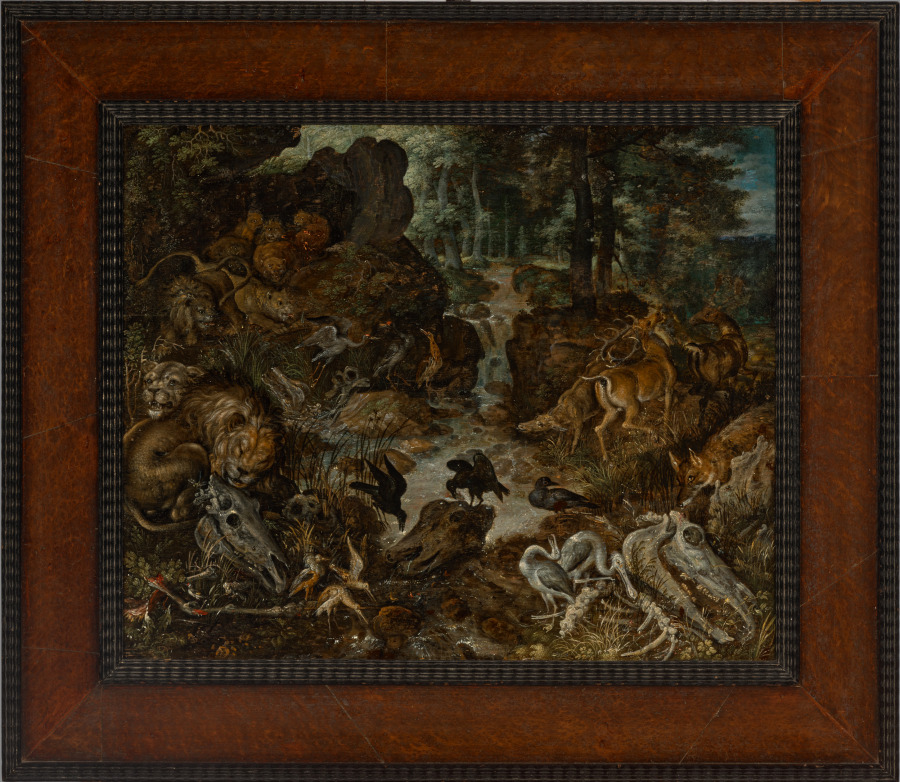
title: Lions and Fox in a Rugged Landscape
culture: Dutch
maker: Roelant Savery (Flemish, 1576–1639)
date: 1576–1637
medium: Oil on panel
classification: Painting